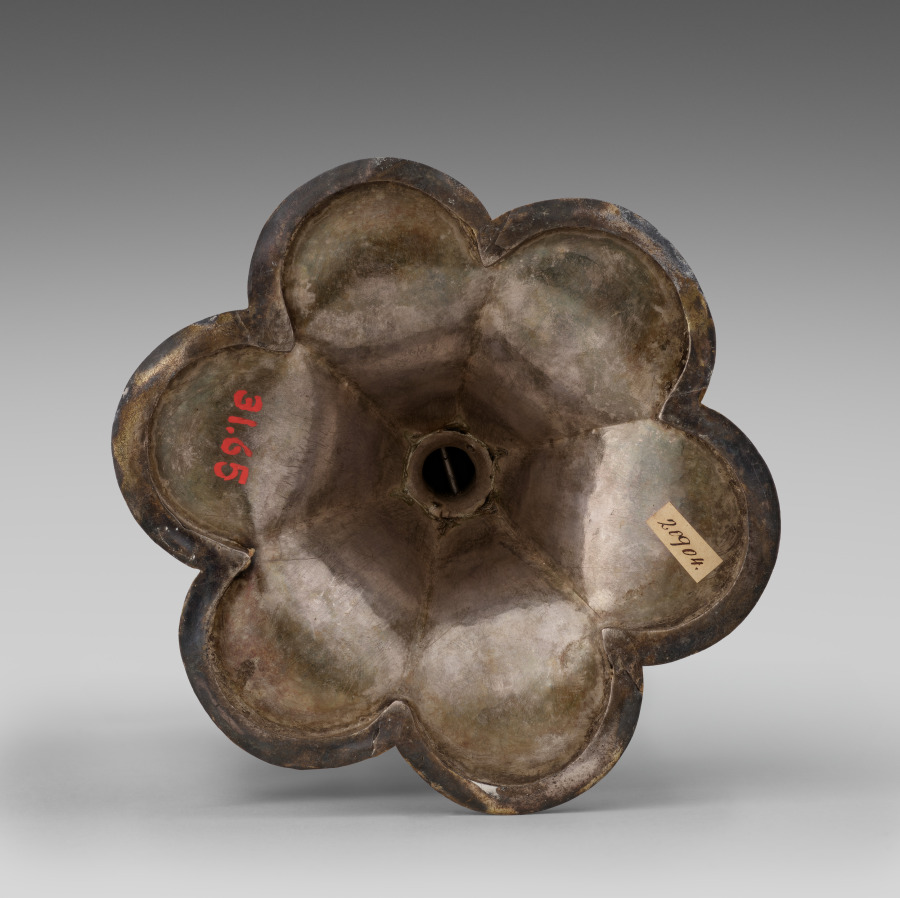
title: Monstrance with a Relic of Saint Sebastian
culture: Germany, Lower Saxony, Brunswick, Gothic period, 15th century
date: 1484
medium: gilded silver, rock crystal, bone, parchment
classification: Metalwork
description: This Late Gothic monstrance (from the Latin monstrare, "to show") is mentioned in the earliest inventory of Saint Blaise as "a large new monstrance containing relics of Saint Sebastian the martyr." Judging from surviving receipts, the reliquary was made by Werner Korff, a local goldsmith, who received payments for silver and gilding at the end of 1484. The reliquary was first displayed on the altar of the church of Saint Blaise in a solemn penitential mass on June 4, 1484, in an effort to ward off the plague. A recent examination revealed that the relic is a human metatarsal bone (one of five long bones of the human foot) and that its owner seemed to have suffered from periostitis, a medical condition that affects the connective tissue surrounding the bone.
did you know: In the Middle Ages, people suffering from diseases might make a journey, or pilgrimage, to venerate relics such as this one. The faithful believed that the remains of saints and holy people like Saint Sebastian could help those seeking aid such as relief from the plague.